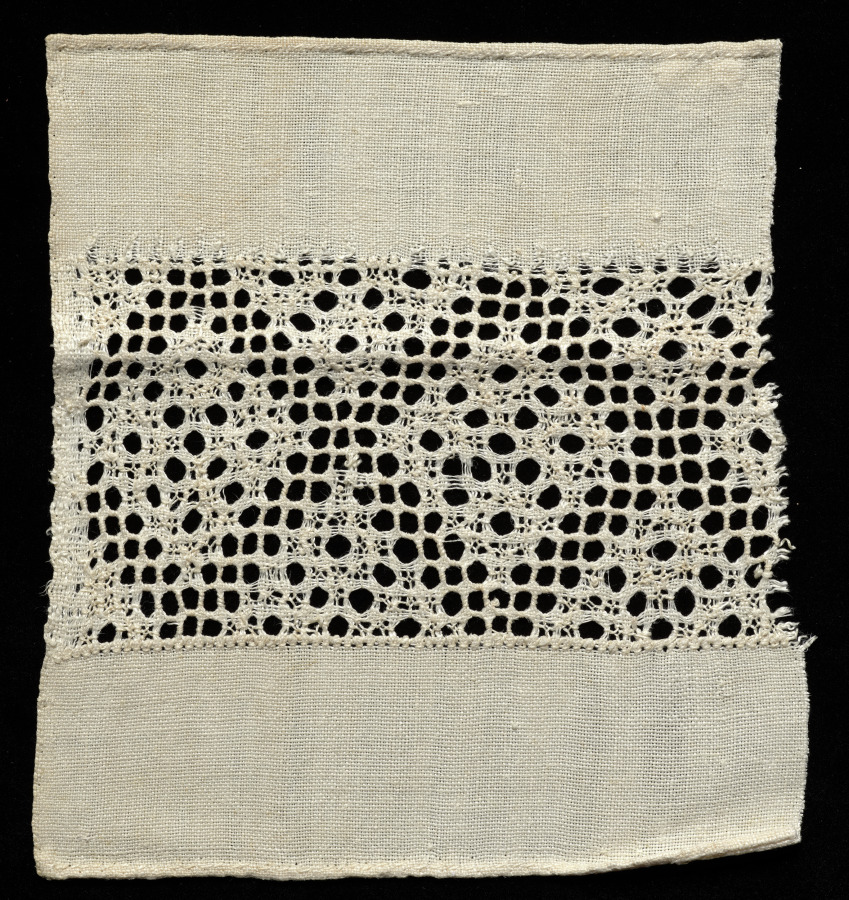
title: Fragment of a band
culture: Spain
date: 1700s-early 1800s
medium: Linen: needle lace (drawnwork)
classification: Lace